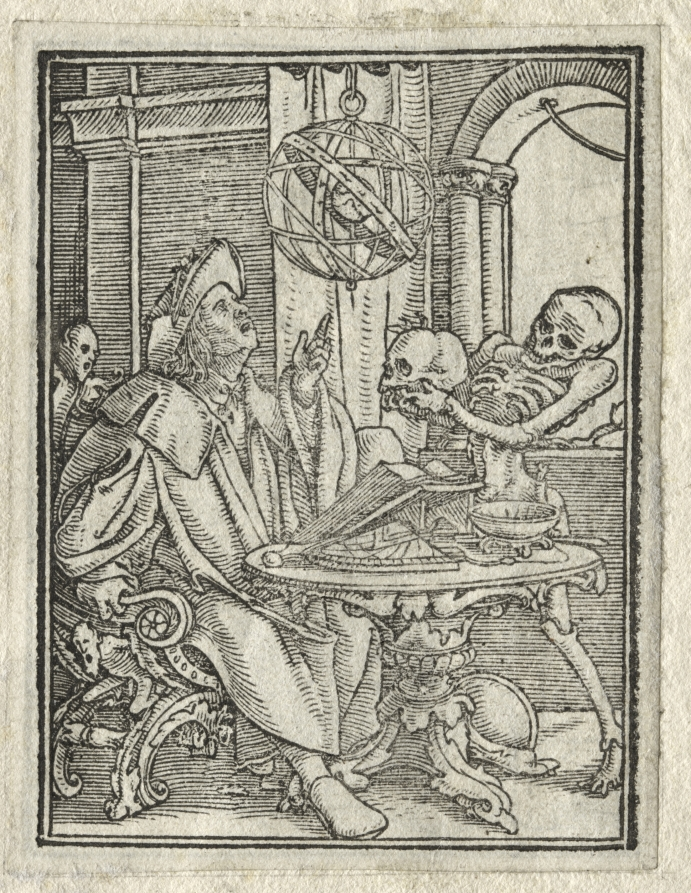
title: The Dance of Death: The Astrologer; The Rich Man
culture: Germany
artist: Hans Holbein the Younger (German, active England and Switzerland, 1497/98–1543)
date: c. 1526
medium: woodcut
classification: Print